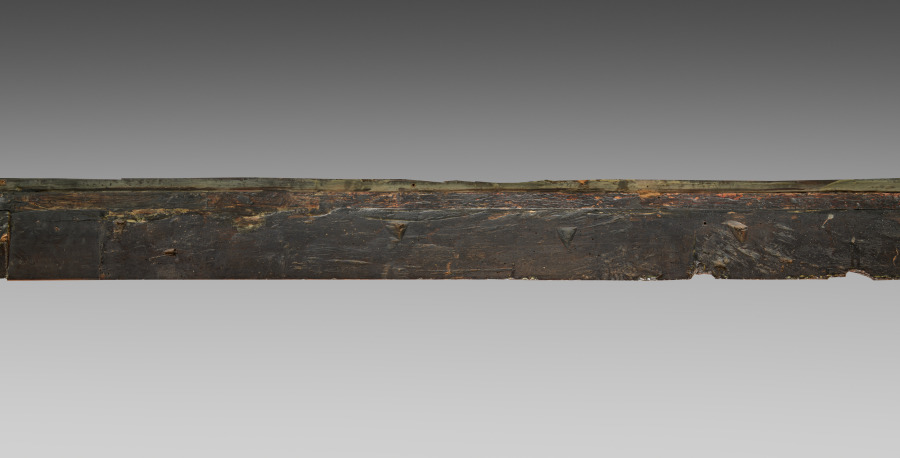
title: Upper Paneling from a Sacristy Armoire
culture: Italy, Florence, late 15th century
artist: attributed to Giuliano da Maiano (Italian, 1432–1490)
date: c. 1460–1475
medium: walnut, inlaid with holly and ebony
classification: Furniture and woodwork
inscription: in four of the five panels is the Medici badge of a jeweled ring wound with a ribbon or bannerole, on which is inscribed the motto "Semper." The frieze in the cornice contains part of a quotation from the Vulgate, Paul's epistle to the Romans, Chapter XI.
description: The imagery on the inset panels is the result of a technique known as intarsia, the skilled inlaying of woods of different colors to create a type of mosaic, popular during the 15th and 16th centuries in Italy for the decoration of paneling and furniture for studies, small rooms, and church sacristies. This large set of five intarsia panels comes from an unknown Florentine church. In its original setting the panels rested upon a row of similarly decorated cupboards (a sacristy armoire) which were used for the storage of liturgical vestments and books. This panel would have therefore been seen at eye level. The central panel depicts the Resurrection of Christ. The two outside panels depict the emblem of Lorenzo de Medici-three plumes encircled by a jeweled ring above a scrolling ribbon containing the Latin word SEMPER (Always). Lorenzo de Medici (1449-92) was the ruler of Florence when this sacristy armoire was constructed and was the likely patron. It seems to be the work of Giuliano da Maiano, an architect and intarsia-maker also responsible for the intarsia in the sacristy of Florence Cathedral.